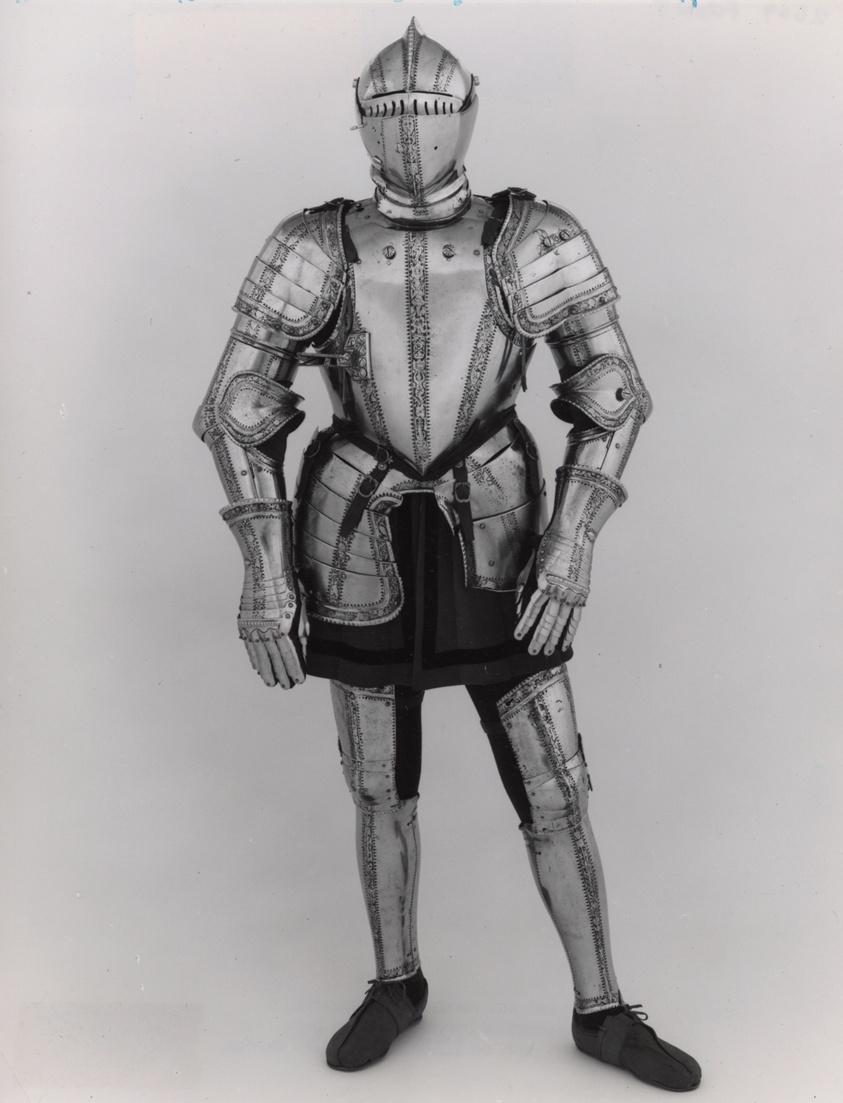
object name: Armor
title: Composite Armor for the Joust and Tourney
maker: German, Augsburg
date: 1560-70 with some restoration before 1841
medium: Steel, brass, and leather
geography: Augsburg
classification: suit; armor; arms and armor